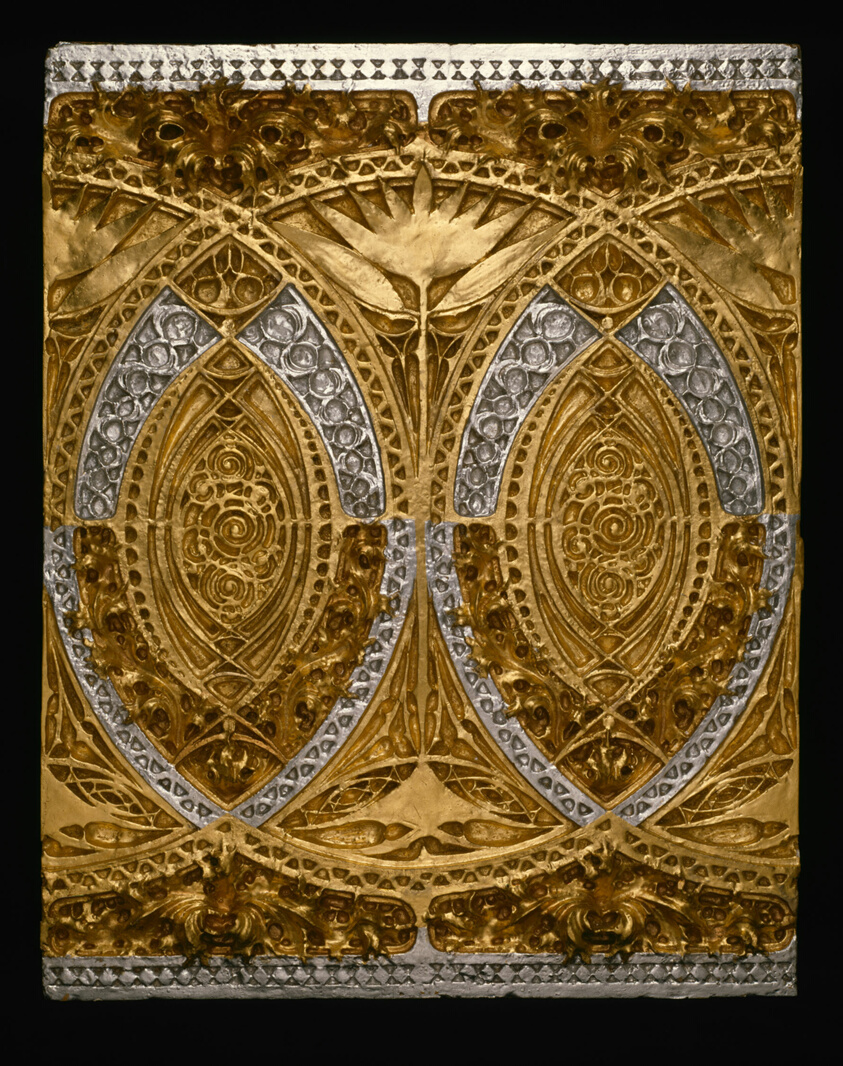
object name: Architectural fragment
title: Schiller Theatre Building, Chicago, Illinois: Banquet Room Frieze Panel (Restored)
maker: Adler & Sullivan, Architects (American, 1881-1895)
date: c. 1891/93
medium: Gold, silver, and bronze paint on reconstructed plaster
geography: Randolph Street, 64 West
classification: architectural fragment; architecture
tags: Chicago, architectural detail, architecture, banquet room, frieze, illinois, panel, restoration, theater